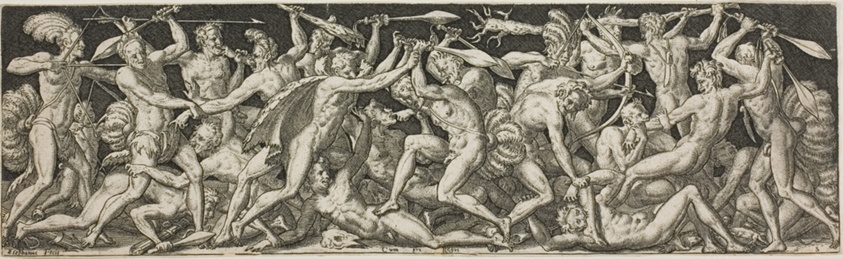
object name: Print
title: Combats and Triumphs: Battle of the Naked Men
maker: Etienne Delaune; French, 1518/19-c.1583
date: 1550/1572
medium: Engraving on ivory laid paper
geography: France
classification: engraving; print; prints and drawing